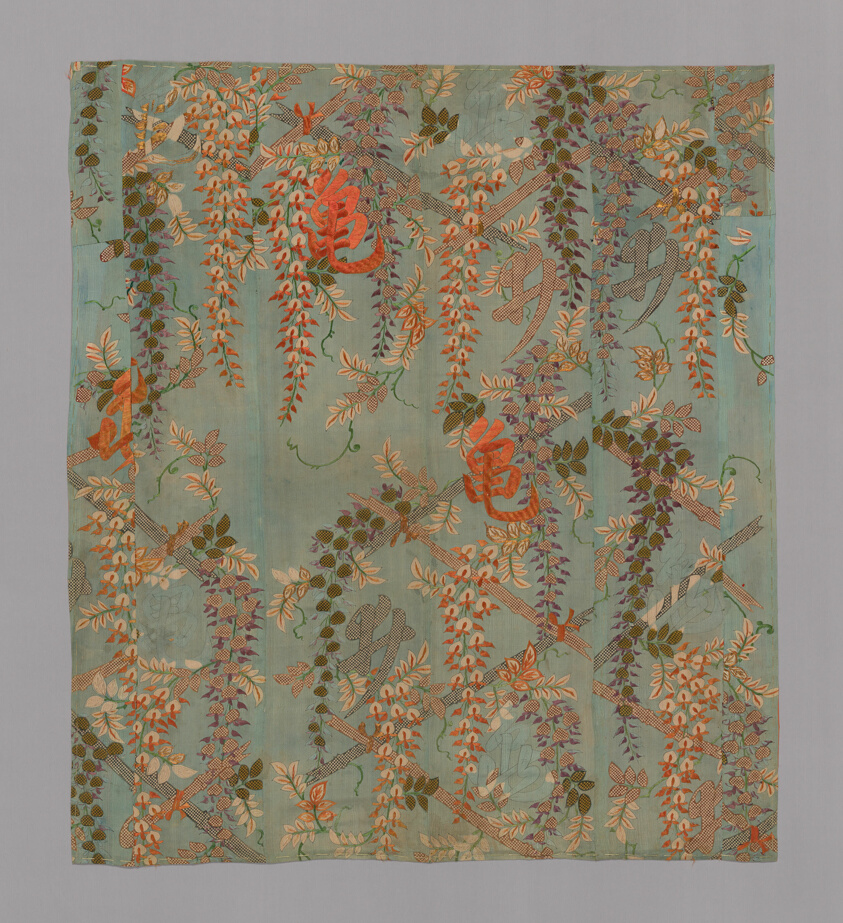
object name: Textile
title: Kosode Made into a Tobari or Fukusa Composed of Six Panels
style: edo (japanese period), Japanism, East Asian, asian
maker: Japan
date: mid–Edo period (1716–1789), early 18th century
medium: Silk, plain weave with creped wefts; drawing with India ink; stenciled and resist dyed; embroidered with silk and gold-leaf-over-lacquered-paper-strip-wrapped cotton in satin, surface satin, stem and straight stitches; laid work and couching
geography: Japan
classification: textile; needlework (visual works)